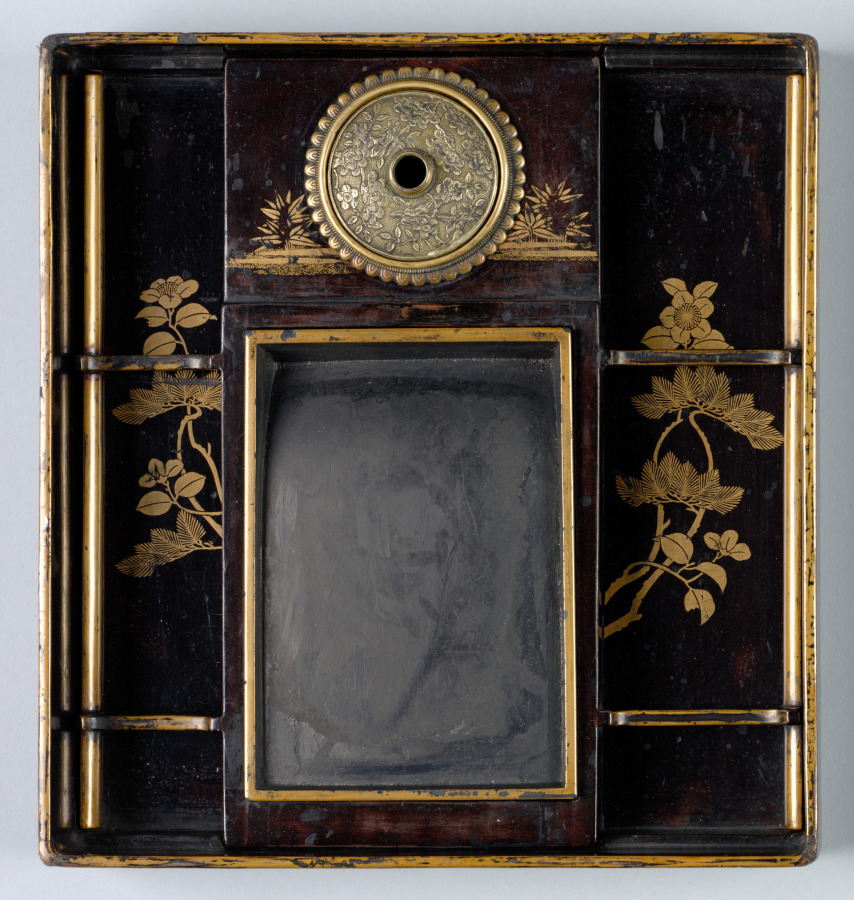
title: Writing Box (Suzuribako) with Design of Pine, Camellia, and Bamboo (base)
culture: Japan, Muromachi period (1392–1573)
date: 1400s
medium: Lacquered wood with gold and silver sprinkled powder (maki-e), stone, and metal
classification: Lacquer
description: Writing boxes were indispensible personal possessions for the literate of medieval Japan. Beyond containing the tools for artistic expression and communication such as an ink stone, writing brushes, and a water dropper, writing boxes often featured scenes from classical literature or symbolic motifs rendered in a wide array of complex lacquer techniques.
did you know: The metal water dropper inside the box above the ink stone also has pine and camellia motifs.